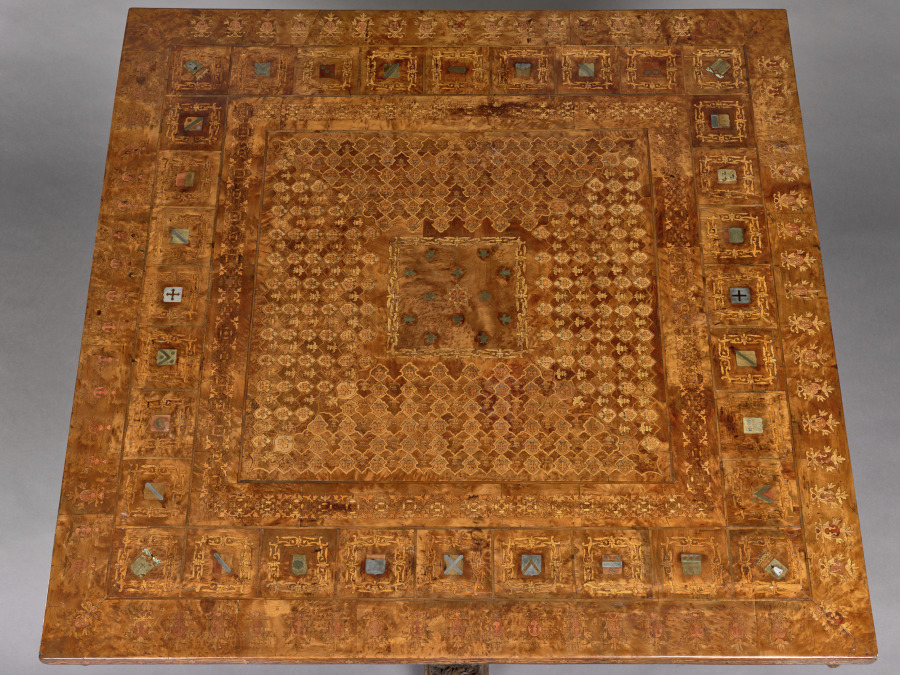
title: Inlaid Table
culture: France, Burgundian School, 16th century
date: 1550–1599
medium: walnut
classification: Furniture and woodwork